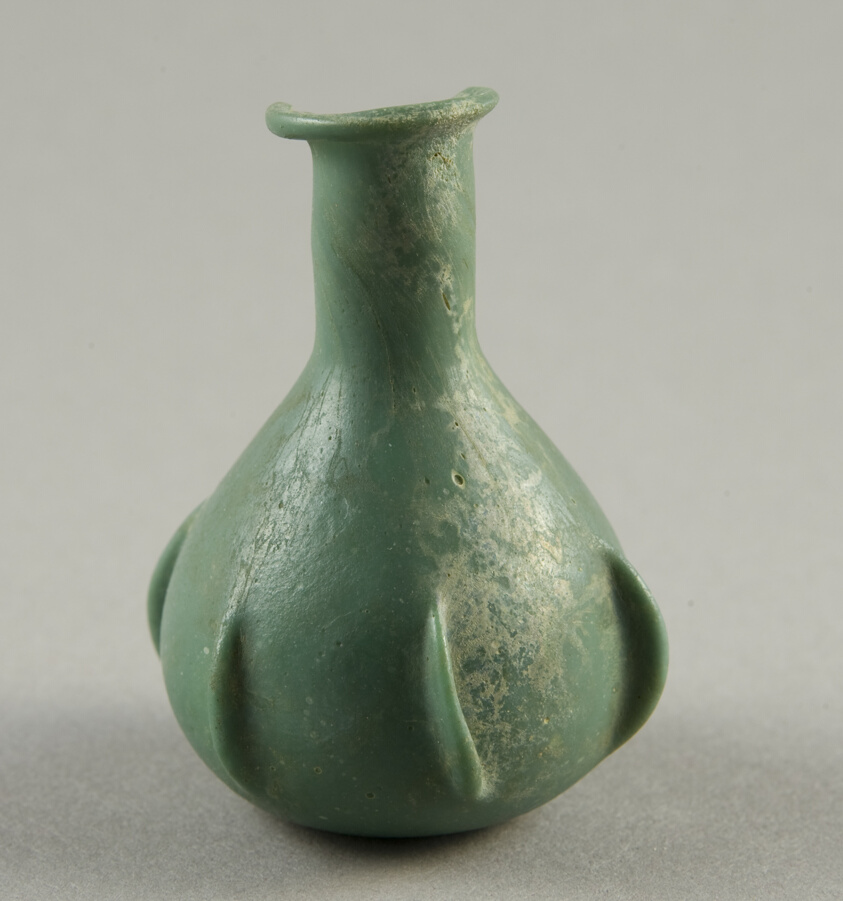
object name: Vessel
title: Bottle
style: syrian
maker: Roman; Levant or Syria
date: 1st century BCE-1st century CE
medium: Glass, blown technique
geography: Syria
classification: bottle; glass; vessel; ancient art